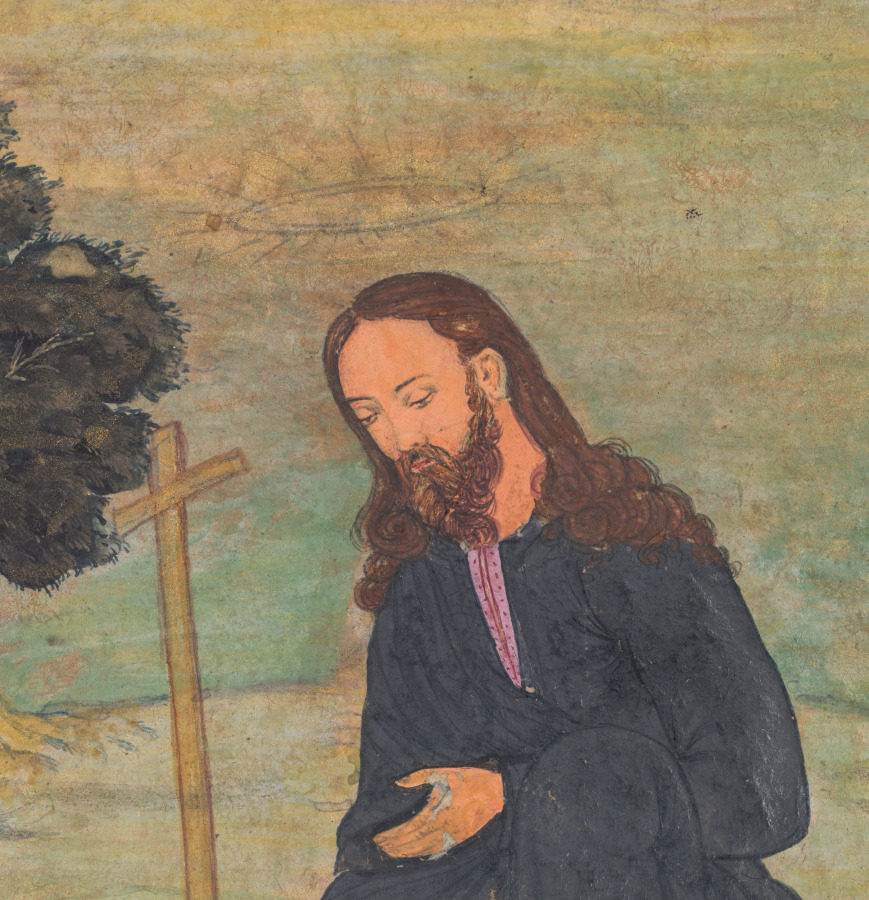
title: Angels bring food to Jesus in the wilderness (folio 55 recto), from a Mirror of Holiness (Mir’at al-quds) of Father Jerome Xavier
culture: Mughal India, Allahabad, made for Prince Salim (1569–1627)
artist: Muhammad Sharif (Indian, active c. 1600)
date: 1602–4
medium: Gum tempera, ink, color, and gold on paper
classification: Manuscript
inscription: Signature of the artist, Muhammad Sharif (Indian, active c. 1600), is written in the tiny pot by Jesus's foot.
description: To end his 40-day fast, five angels brought Jesus refreshments from heaven: breads, melons each with a knife for convenient cutting, fresh leeks, and what appear to be fragrant rice dishes and curries, along with cups of wine. Four of the angels are dressed in robes, and one is clothed only in feathers. After his baptism, Jesus spent 40 days and nights in the desert where he fasted, practiced spiritual exercises, and successfully resisted the temptations of Satan. Many of the rocks in this painting have faces, called grotesques. This page is the only surviving folio from this manuscript that has an artist’s signature, written in the tiny pot by Jesus’s foot.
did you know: The artist has put faces in the rocks, following a Persian convention.